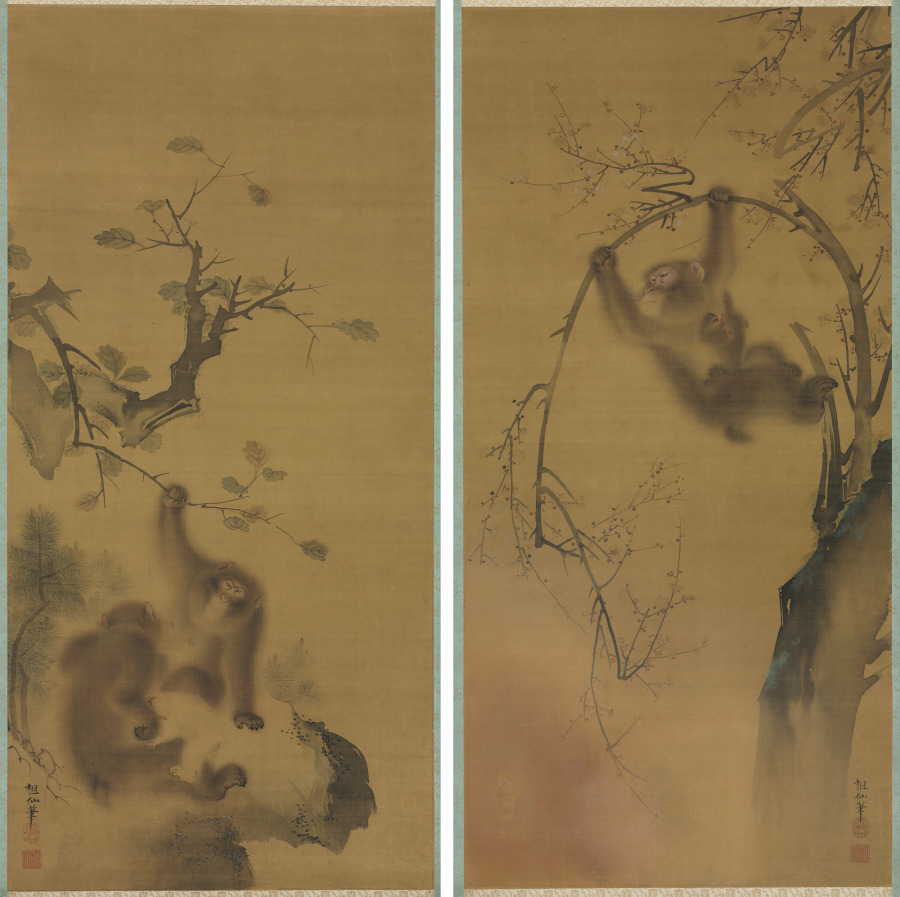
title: Monkeys in a Cherry Tree; Monkeys on a Rock Ledge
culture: Japan, Edo period (1615–1868)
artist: Mori Sosen (Japanese, 1747–1821)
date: c. 1800–1821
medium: hanging scroll, mounted and framed, ink and color on silk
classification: Painting